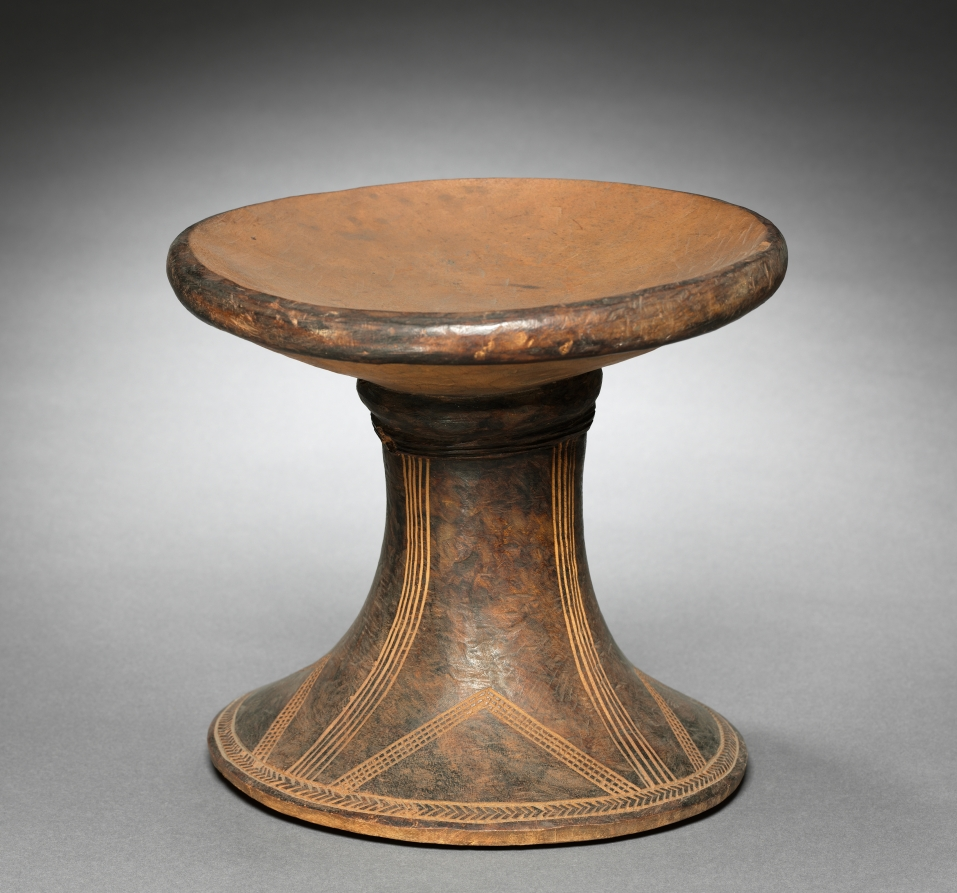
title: Stool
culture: Central Africa, Democratic Republic of the Congo, Nyanga, early 20th Century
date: before 1929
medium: wood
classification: Furniture and woodwork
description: Carved from a single piece of wood, Nyanga stools like this were multipurpose and took on different meanings depending on their use. Shaped like a curved hourglass, the shiny, patinated surface is textured with incised geometric designs. One use was for young male initiates to sit on as they received gifts from relatives following circumcision rites. The stools were oiled for the occasion, which results in the smooth, colored texture visible today.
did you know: This stool isn't asymmetrical, it's ergonomic! The seat tilts to make it more comfortable to use.